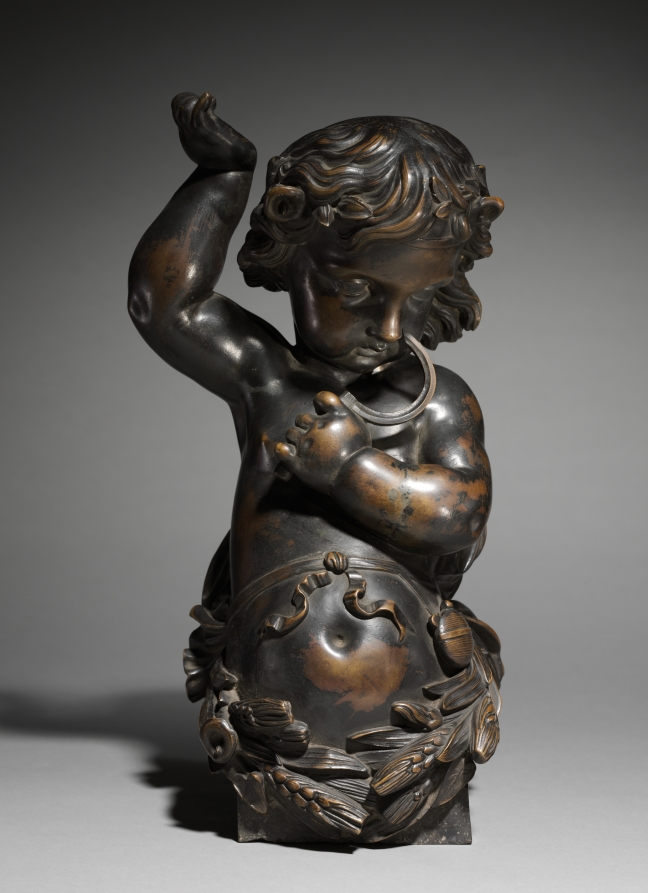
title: Autumn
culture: France, 19th century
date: 1800s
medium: bronze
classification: Sculpture